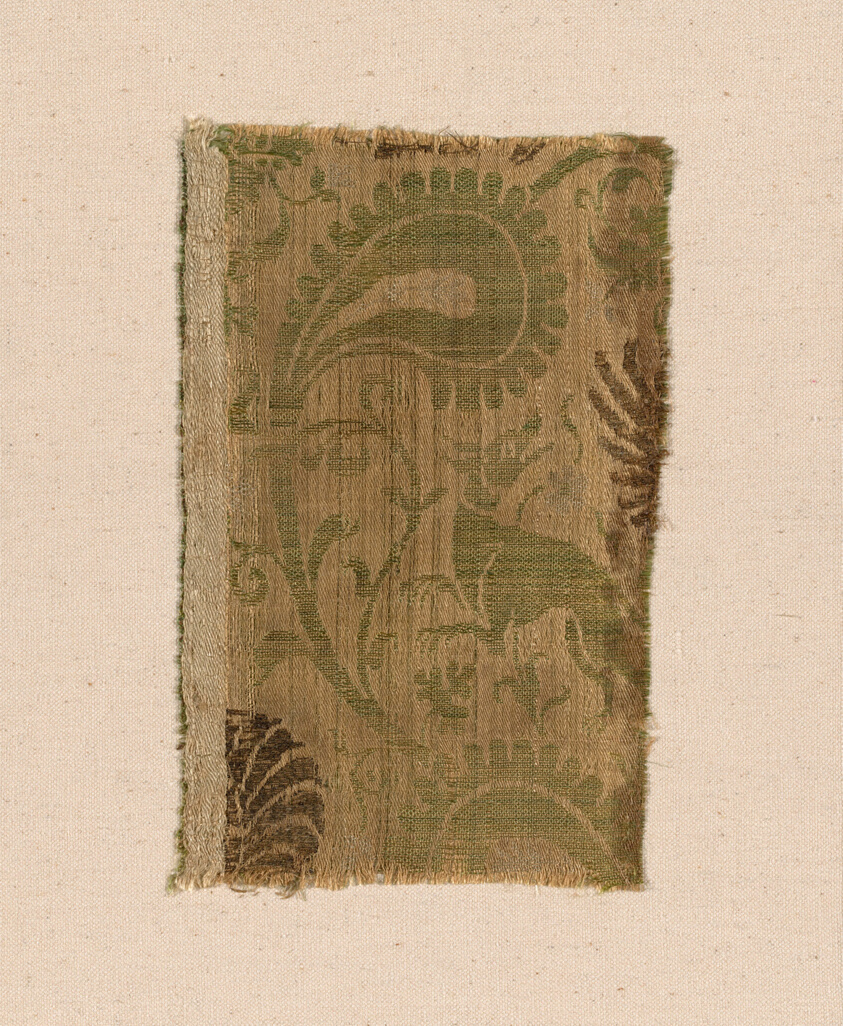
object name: Textile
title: Fragment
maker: Italy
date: 14th century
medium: Silk and gilt-animal-substrate-wrapped linen, warp-float faced twill weave with supplementary patterning and brocading wefts bound by secondary binding warps in plain interlacing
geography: Italy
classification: textile; weaving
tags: dogs, animals